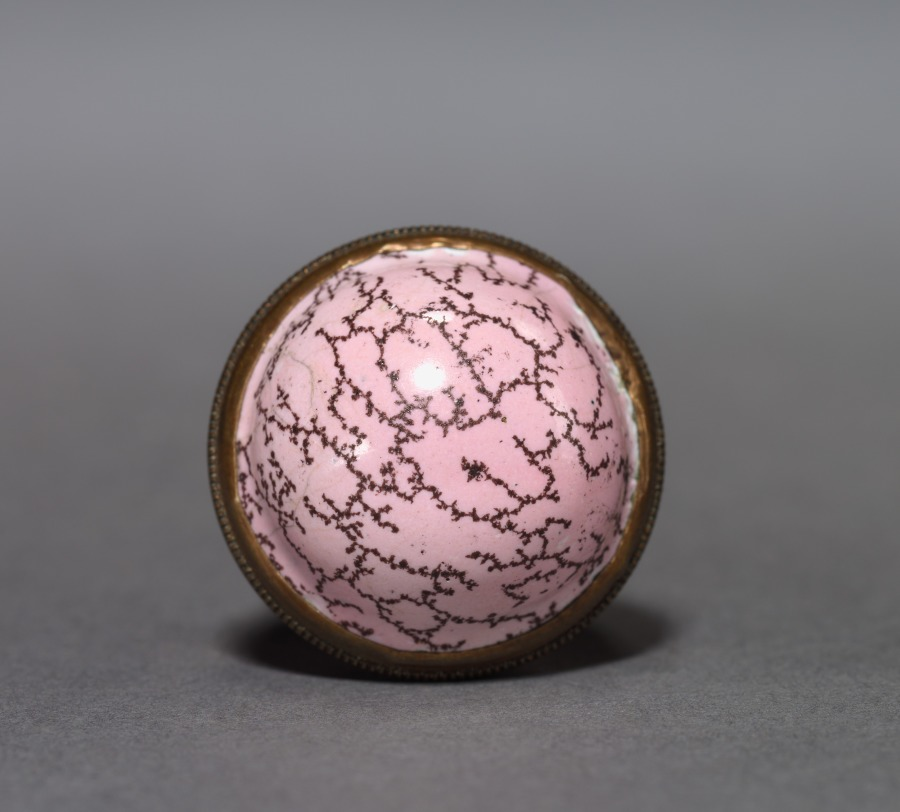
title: Thimble and Container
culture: England, mid-18th century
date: mid-18th century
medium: enamel on metal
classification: Enamel